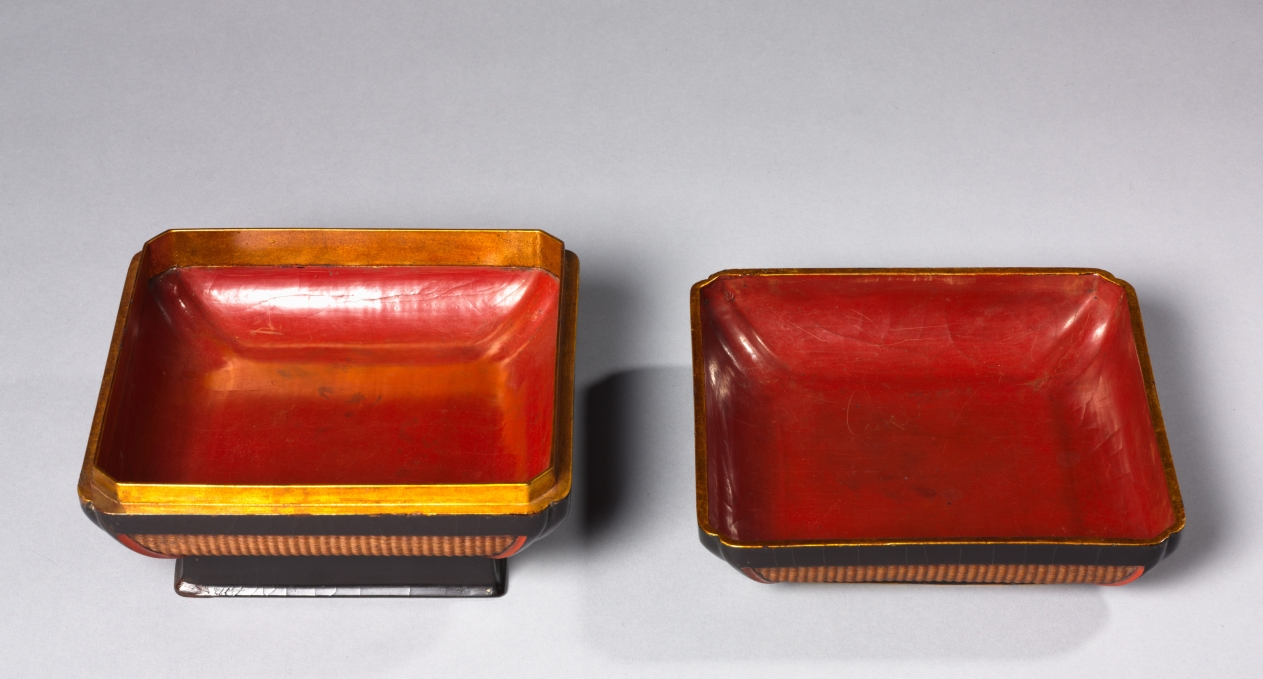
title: Wickerwork Box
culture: China, Ming dynasty (1368-1644), Wanli reign (1572-1620)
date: 1609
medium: lacquered wickerwork (of woven bamboo) framed in wood with circular scene inlaid in mother-of-pearl and gold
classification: Lacquer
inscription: Inscription at bottom in red on black lacquer reads: "commissioned by Yü-Yün-ch'i".